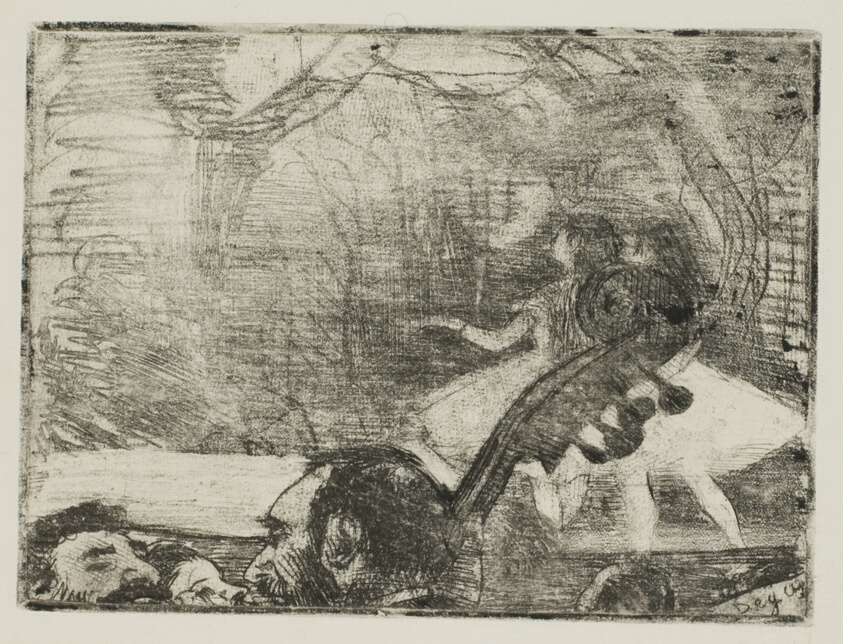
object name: Print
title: On Stage I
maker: Edgar Degas; French, 1834-1917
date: 1876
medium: Soft ground etching and drypoint in black on ivory wove paper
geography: France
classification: etching; paper; print; prints and drawing